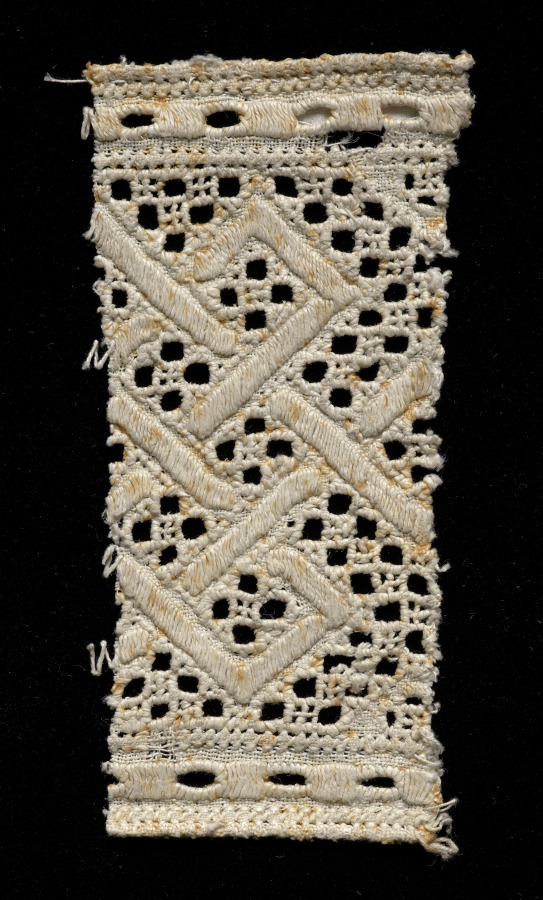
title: Lace fragment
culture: Italy, Venice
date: 1500s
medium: Linen: needle lace (cutwork) insertion and embroidery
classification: Lace